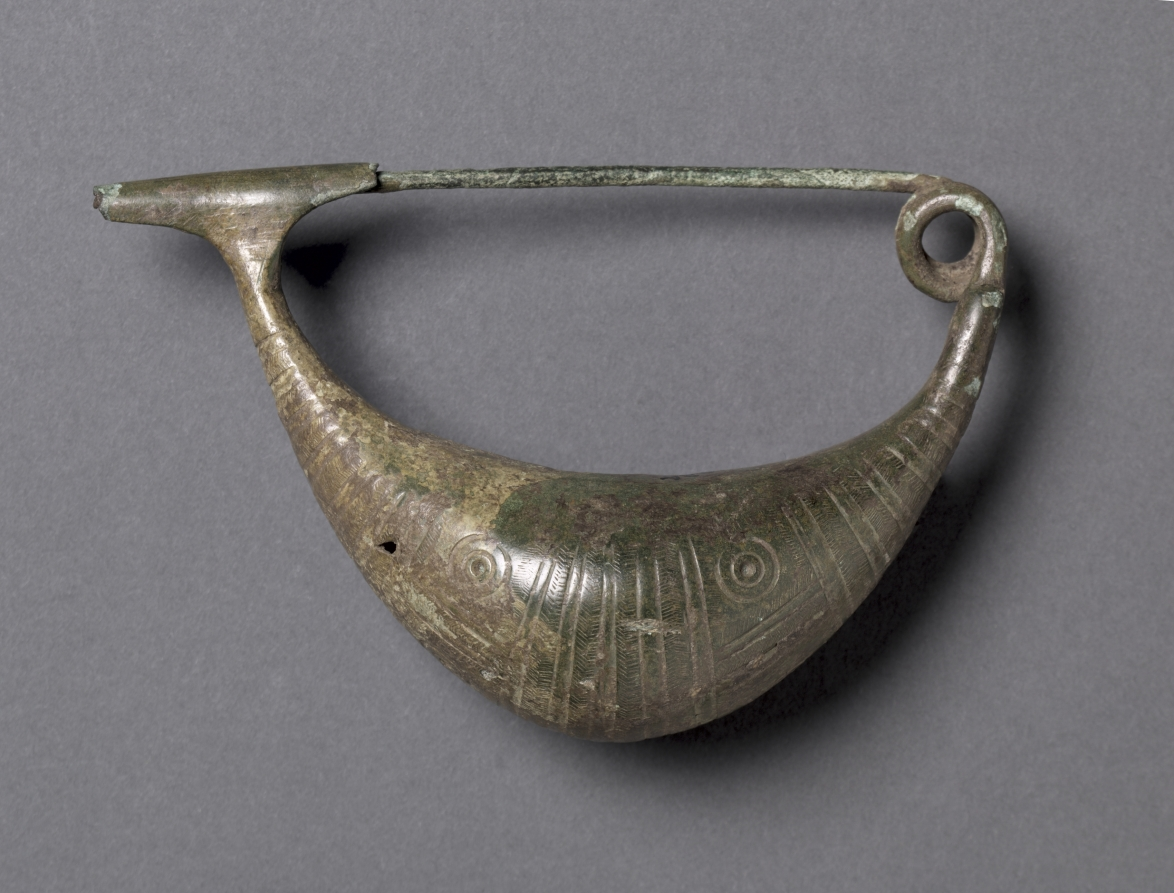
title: Boat-Shaped Fibula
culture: Etruscan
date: c. 900–700 BCE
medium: bronze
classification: Jewelry